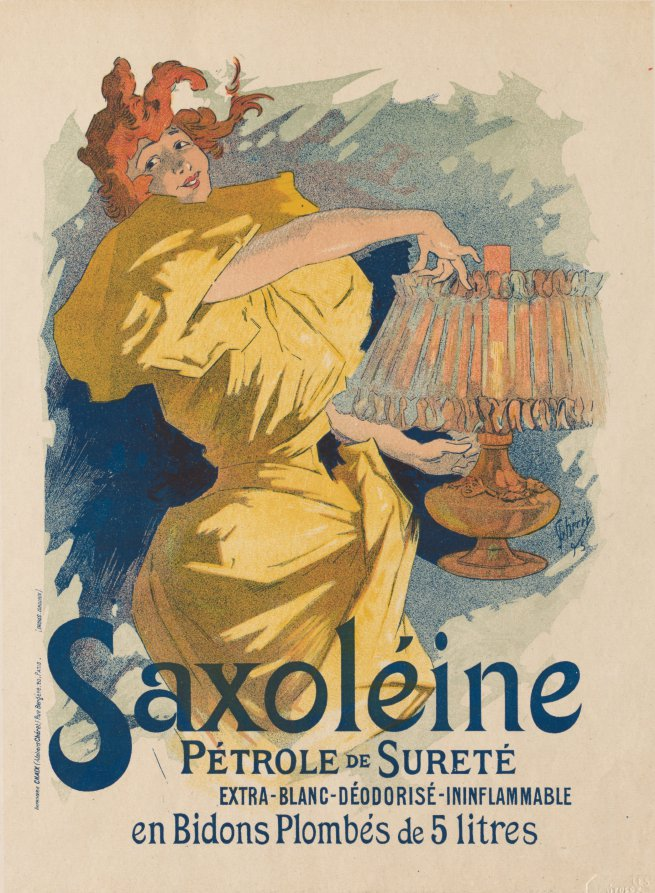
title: Les Maitres de L'Affiche: Pl. 13, Saxoléine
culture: France, 19th century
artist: Jules Chéret (French, 1836–1932)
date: 1895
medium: color lithograph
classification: Print